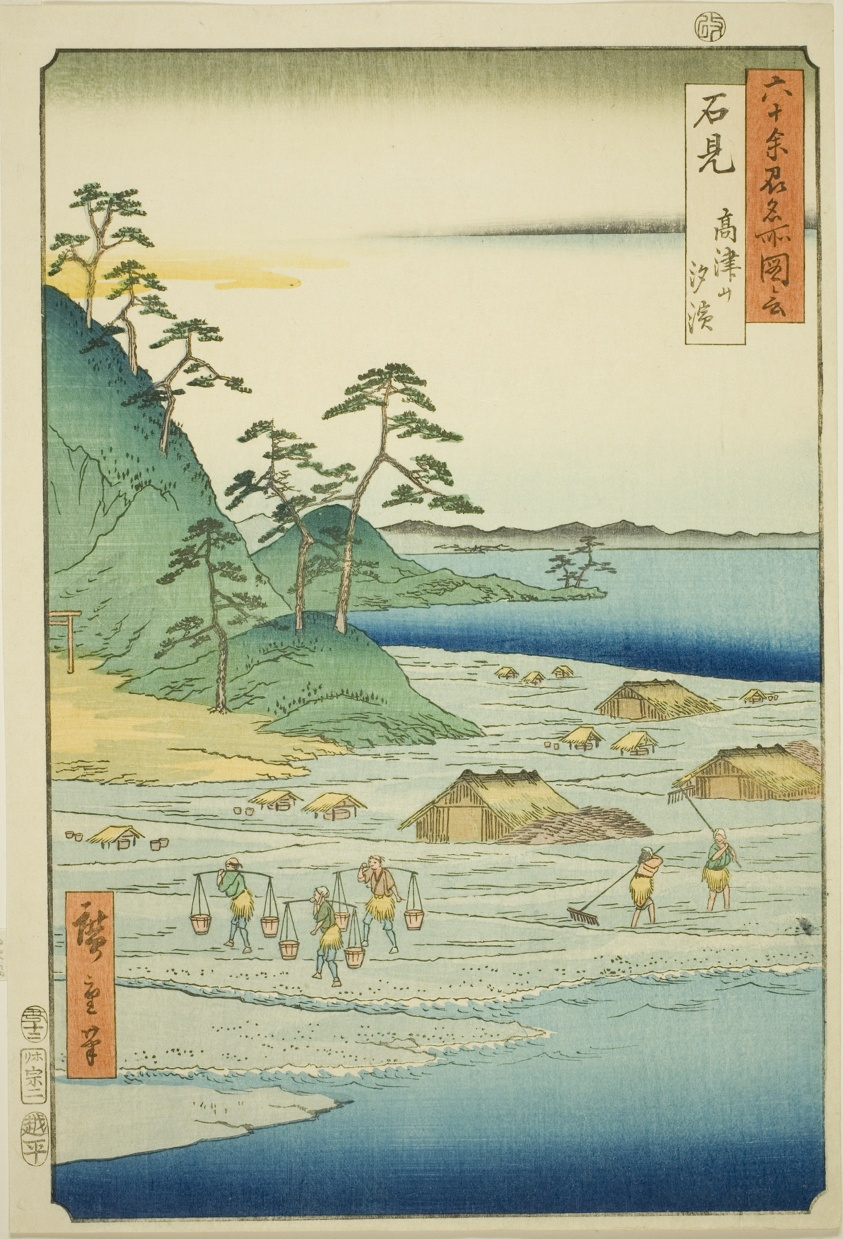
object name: Print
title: Iwami Province: Salt Beaches near Takatsu Hill (Iwami, Takatsuyama shiohama), from the series "Famous Places in the Sixty-odd Provinces (Rokujuyoshu meisho zue)"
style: Japanese (culture or style)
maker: Utagawa Hiroshige 歌川 広重; Japanese, 1797-1858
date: 1853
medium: Color woodblock print; oban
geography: Japan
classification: woodblock print; print; asian art